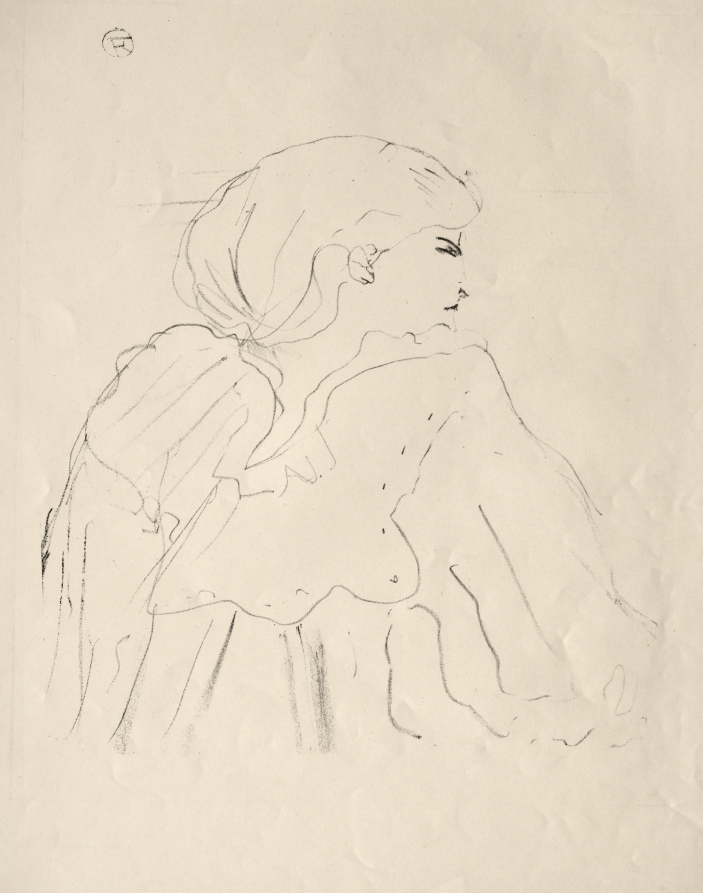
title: Cassive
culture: France, 19th century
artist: Henri de Toulouse-Lautrec (French, 1864–1901)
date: c. 1895–96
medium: lithograph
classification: Print